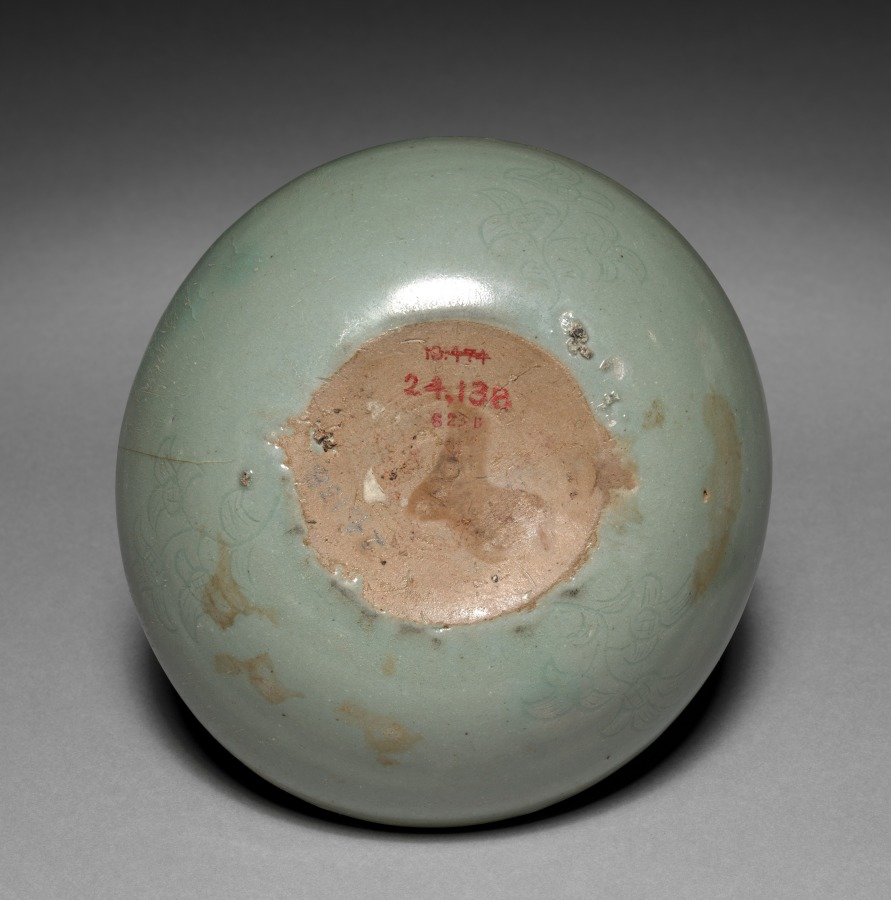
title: Dish with Incised Floral Design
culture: Korea, Goryeo dynasty (918–1392)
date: 1100s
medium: glazed porcelain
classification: Ceramic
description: Celadon wares used for everyday such as this dish were among the most common burial objects in tombs during the Goryeo period (918–1392). Furnishing tombs with an elaborate assemblage of objects was believed to honor and comfort the newly dead. Generally, Goryeo tombs were left untouched until the late 1800s. During the colonial period (1910–45), however, Japanese archaeologists competitively excavated the tombs located in Kaeseong, the former capital of the Goryeo period, and these wares soon became available for Japanese and Western collectors.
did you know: The translucent greenish and bluish glaze of Goryeo celadons, shown in this vase, is the result of distinctive small and long Korean kilns, which maintained a low oxygen saturation with a high level of carbon dioxide.